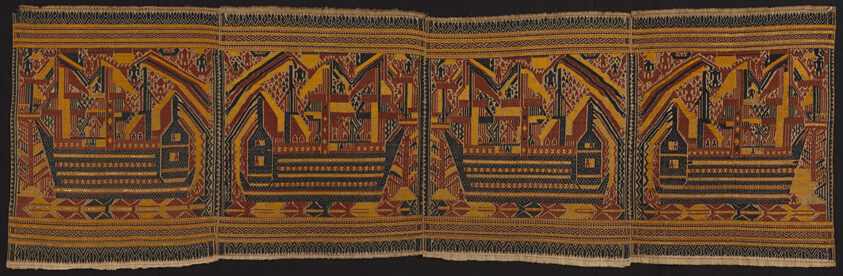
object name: Religious/Ritual Object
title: Ceremonial Textile (Tampan)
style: indonesian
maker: Paminggir people; Indonesia, South Sumatra, Lampung area, Possibly Kota Agung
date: Late 19th century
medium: Four panels joined; cotton, gilt-metal strip, silvered-paper-strip wrapped silk, plain weave with supplementary patterning and brocading wefts; stitched together with pineapple fiber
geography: Indonesia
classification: textile; weaving; ritual objects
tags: boats, vessels, ships, ritual